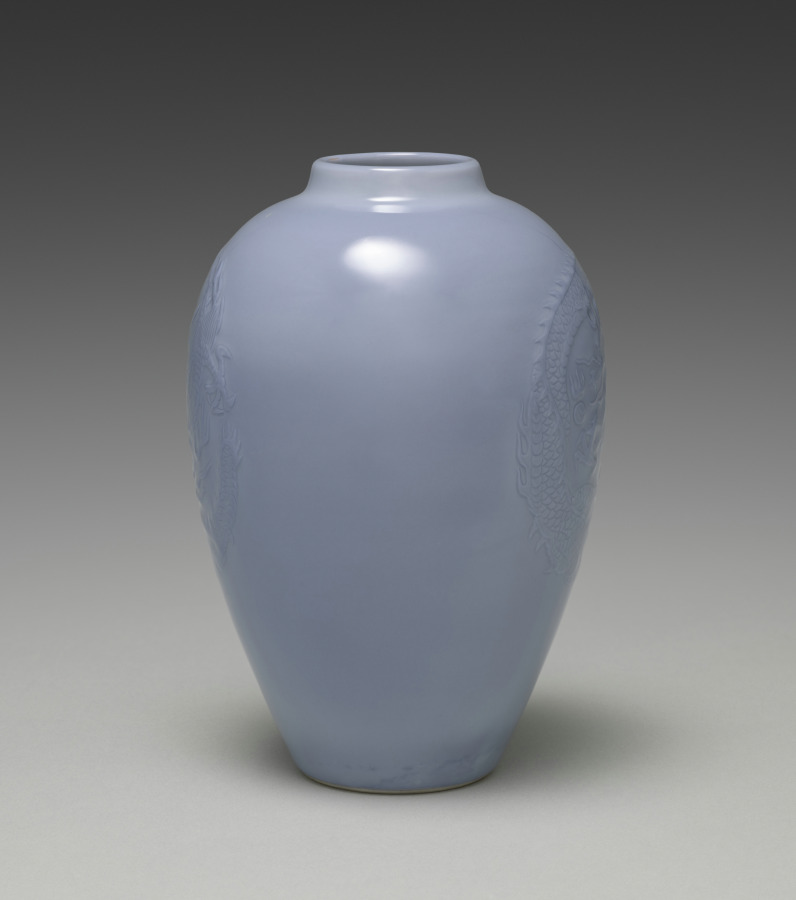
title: Vase with Dragon Roundels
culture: Japan, Meiji period (1868–1912)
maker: Seifū Yohei III (Japanese, 1851–1914)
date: 1900–1914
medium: Porcelain with purple glaze and molded and carved design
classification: Ceramic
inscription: 清風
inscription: 成山清風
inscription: The top of the box lid describes the vase.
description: Each side of this lavender-colored vase is nearly covered with a low-relief design of a four-clawed dragon curled around a flaming jewel. The box lid carries an attestation by Yohei IV that the vase was produced by his predecessor, and the signature on the base is one Yohei III used later in his career. The lid also makes reference to Jun (J. Kin) ware, which was made in numerous kilns in what is now Yuzhou or Yuxian in Henan Province, China, during the Northern Song dynasty. Some Jun wares had an opalescent purple glaze, which was clearly the inspiration for the color seen on this vase.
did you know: Kyoto-based Japanese ceramist Seifū Yohei III (1851–1914) admired the glaze colors found on Chinese porcelain and tried to replicate them through intensive experimentation.